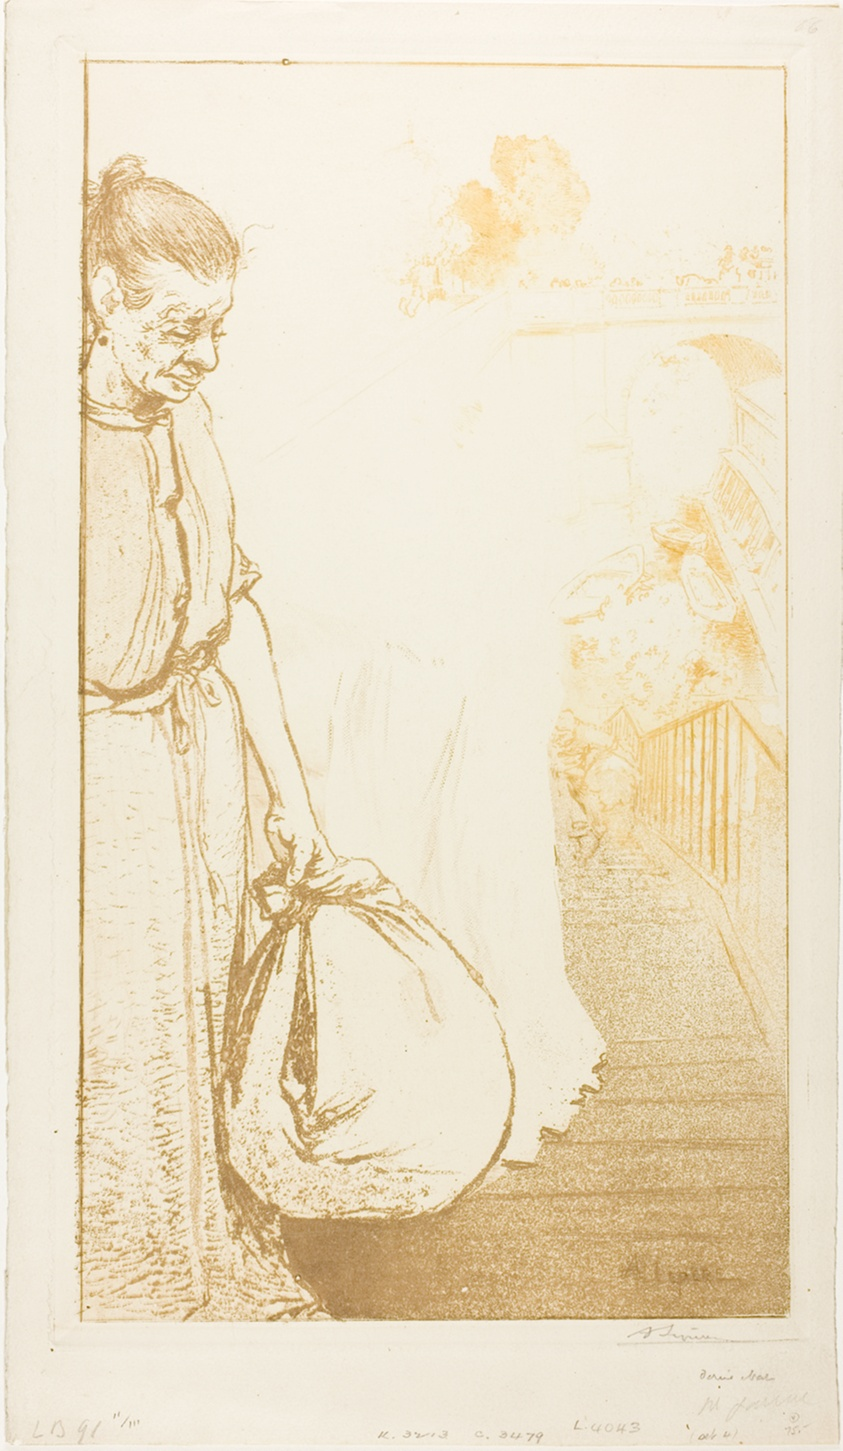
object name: Print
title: The Laundresses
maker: Louis Auguste Lepère (French, 1849-1918)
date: 1894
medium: Soft ground etching with aquatint and roulette in tan and yellow ochre on cream wove paper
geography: France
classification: etching; print; prints and drawing